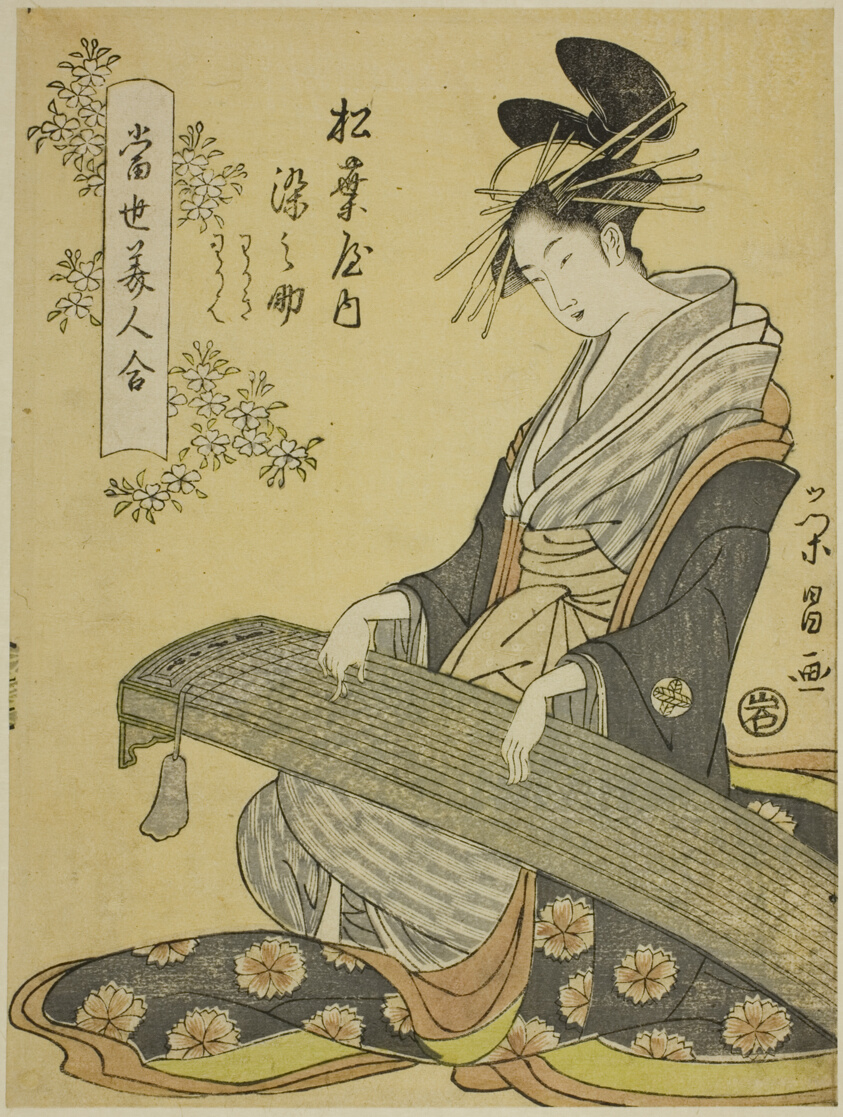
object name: Print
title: The Courtesan Somenosuke of the Matsubaya, and Attendants Wakagi and Wakaba, from the series "A Comparison of Contemporary Beauties (Tosei bijin awase)"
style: Japanese (culture or style)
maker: Chokosai Eisho (Japanese, active 1780–1800)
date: c. 1796/97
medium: Color woodblock print; chuban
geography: Japan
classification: woodblock print; print; asian art